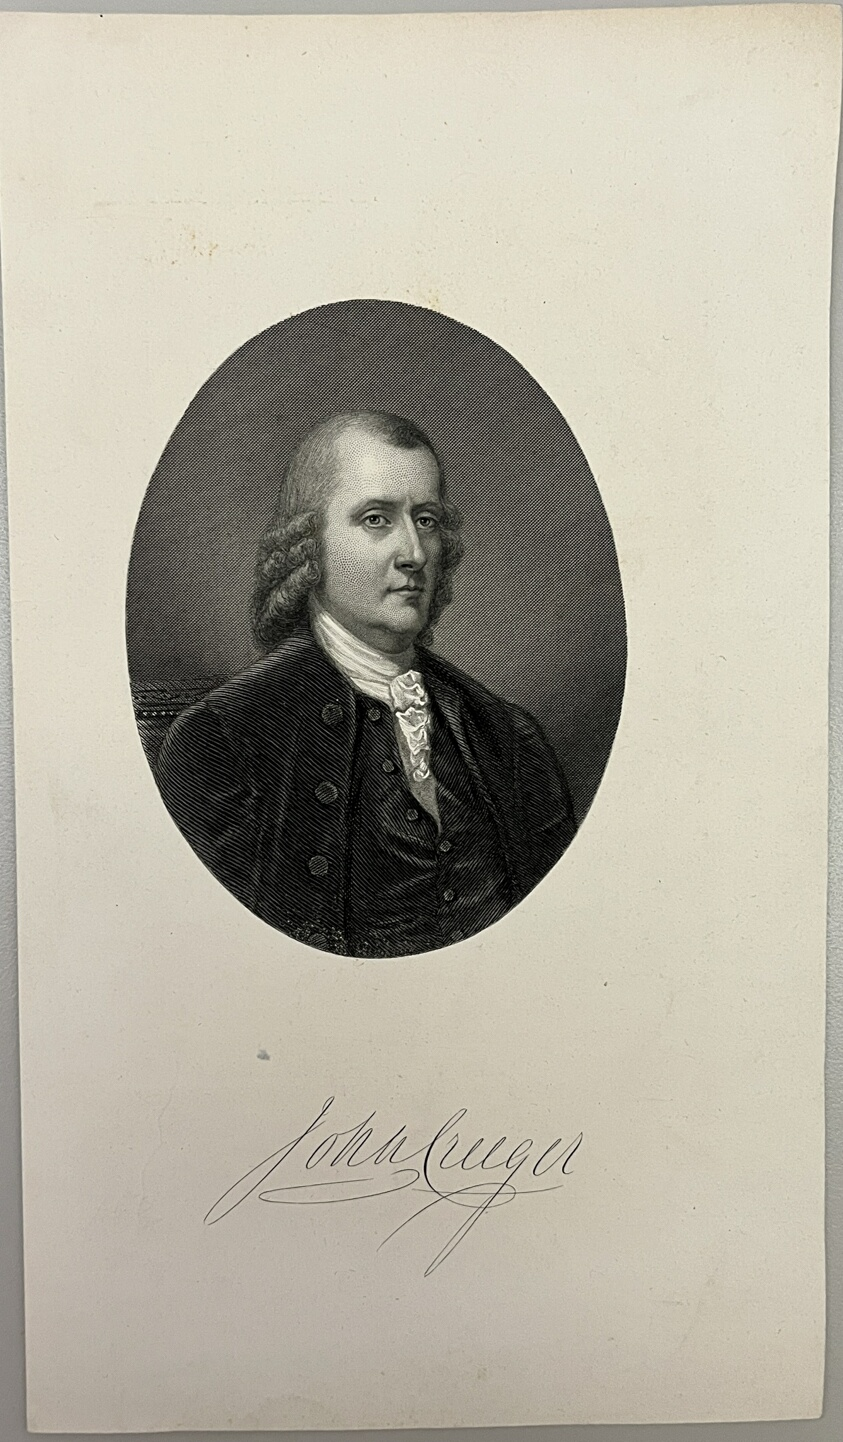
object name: Print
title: John Creeger [?]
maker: Artist Unknown (Likely American or British, 19th century)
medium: Stipple engraving on paper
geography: United States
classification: reproduction; print; prints and drawing